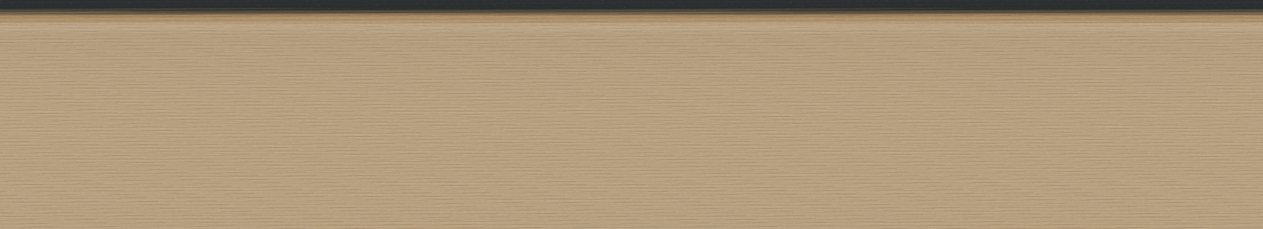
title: The Lantern Night Excursion of Zhong Kui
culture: China, Yuan dynasty (1271-1368)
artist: Yan Hui (Chinese, active 1270–1310)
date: late 1200s–early 1300s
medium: handscroll; ink and slight color on silk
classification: Painting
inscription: Artist's signature [and probable seal]: Yan Qiuyue 顏秋月 Title on frontispiece and 1 seal of Niu Shuyu 鈕樹玉 (1760–1827): Qiuyue mohuan 秋月墨幻 [Qiuyue's Ink Fantasy]. 31 additional seals: 2 of Yang Shiqi 楊士奇 (1365–1444); 2 of An Guo 安國 (1481–1534); 8 of Xiang Yuanbian 項元汴 (1525–1590); 2 of Geng Zhaozhong 耿昭忠 (1640–1686); 4 of Pu Tung 溥侗 (1870–1952); 7 of Tan Jing 譚敬 (1911–1991); 1 of Liu Ting-chih (20th c.); 5 unidentified.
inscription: An inscription by Zizhi Shanren 紫芝山人 [probably Jiang Hui 蔣惠], dated 1389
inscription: An inscription by Wu Kuan 吳寬 (1436–1504)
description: Here, the demon queller Zhong Kui leads a nightly procession of street entertainers with bare, muscular bodies and demonic faces. Some wear shabby clothes, and all perform stunts and tricks to astound and scare the viewer. In fact, a New Year custom in cities of southeast China had the poor, disguised as demons, process through the streets and play their tricks to clear households of evil spirits and welcome the spring. From right to left, a demonic figure leads the procession and beats a drum; another lifts a large rock; one stands on his hands trying to drink; one balances a jar on his elbow; three hold and wield weapons; one carries a folded chair covered by a cow’s skin; another holds Zhong Kui’s qin (zither), books, brush, and inkstone. At the end of the scroll, two figures offer a cup and bottle of wine to Zhong Kui, who lifts his hand in command.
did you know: Zhong Kui was an ancient ghostbuster.